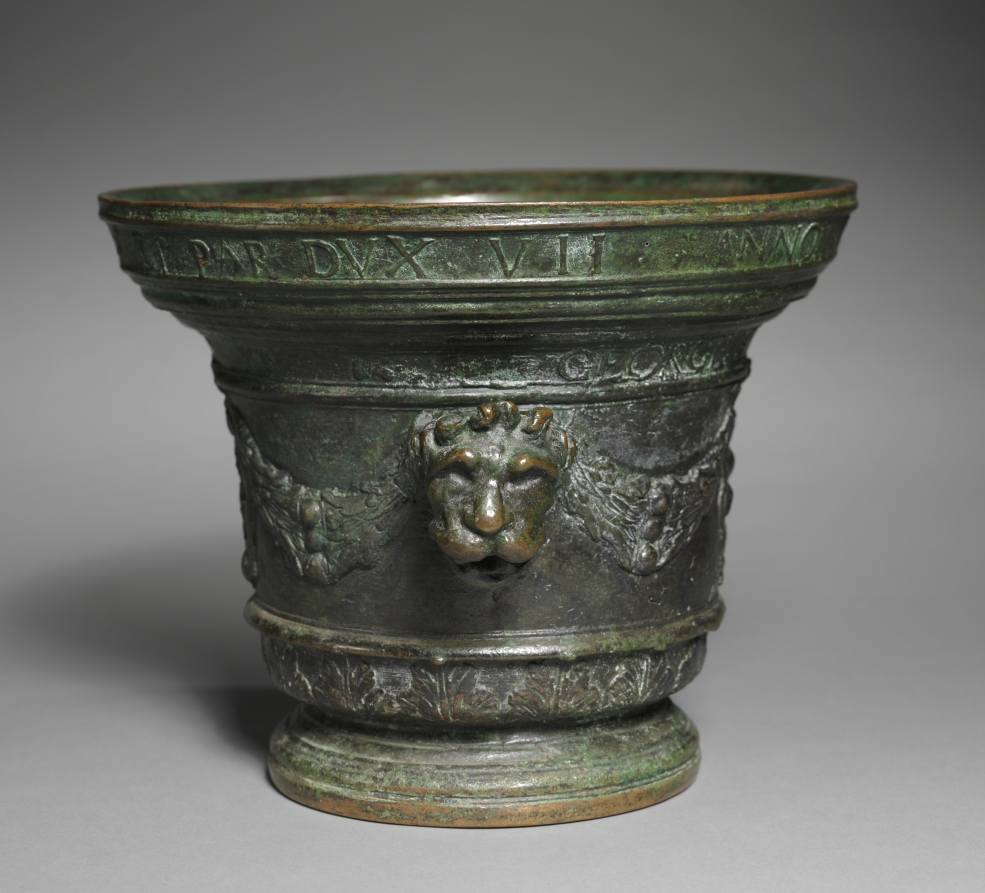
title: Mortar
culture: Italy, 18th century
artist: Georgius Mazzochus (Italian)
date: 1712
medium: bronze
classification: Sculpture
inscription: Inscription on obverse: "ANNO M D C C XII / GEORGIUS MAZZOCHUS / (fleur-de-lis)" Insciption on reverse: "FRANC I . PLAC ET PAR DUX VII / FECIT / (crowned shield with 6 fleur-de-lis)"